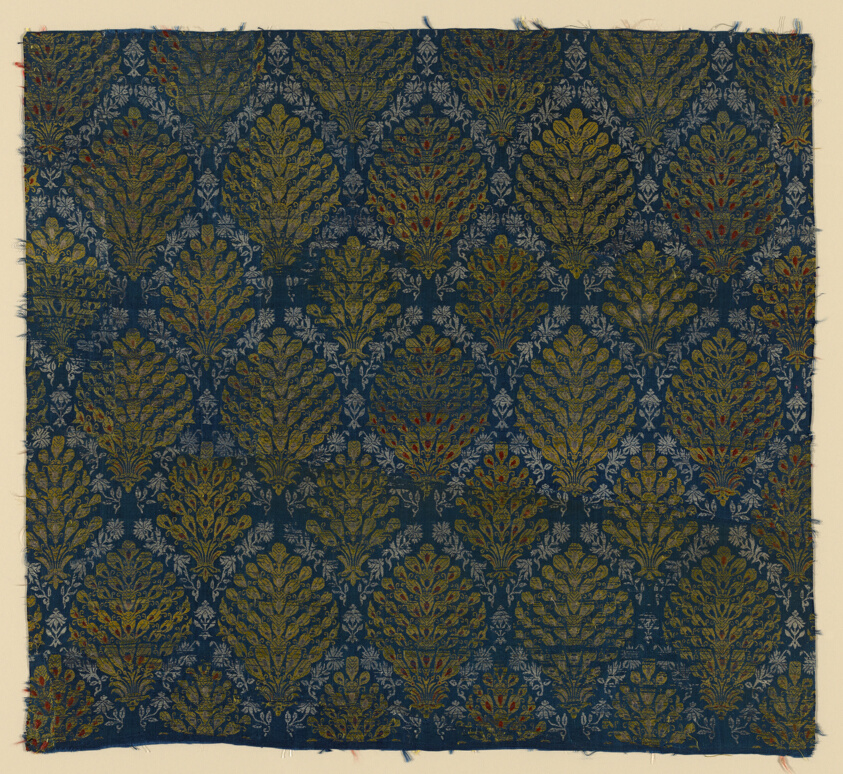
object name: Textile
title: Panel (Dress Fabric)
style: kashan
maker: Iran (Persia, Esfahan)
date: 18th/19th century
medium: Silk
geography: Iran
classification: textile; weaving